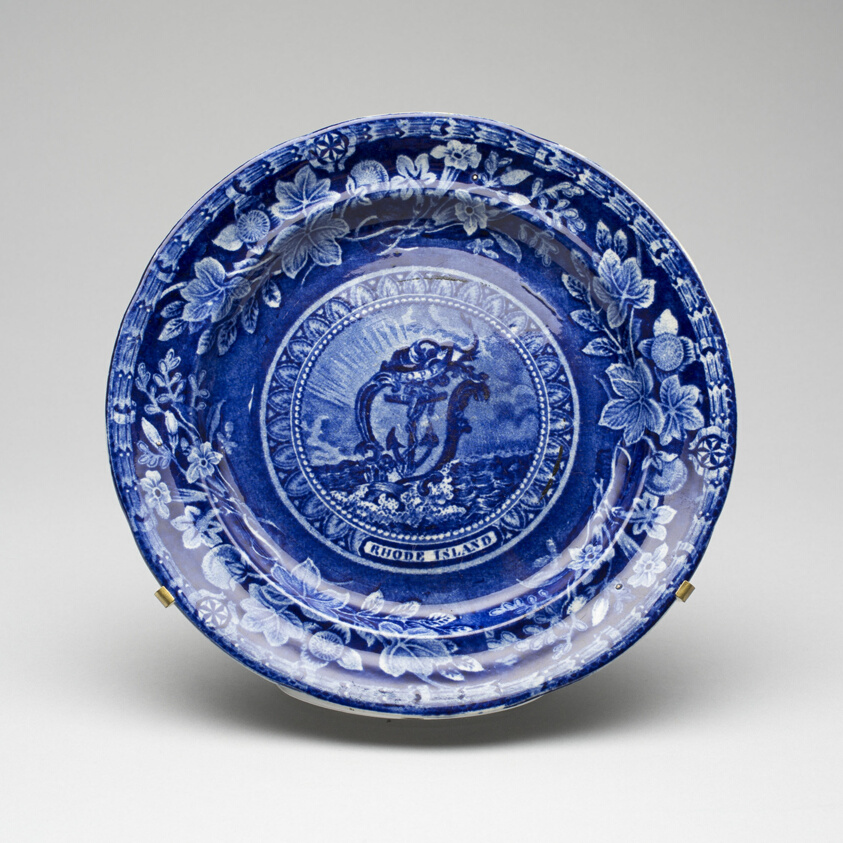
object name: Decorative Arts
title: Plate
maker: English for the American market; Staffordshire, England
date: c. 1829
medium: Earthenware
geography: Staffordshire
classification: plate (general, dish); earthenware; dish (vessel); american decorative arts; ceramics; decorative arts